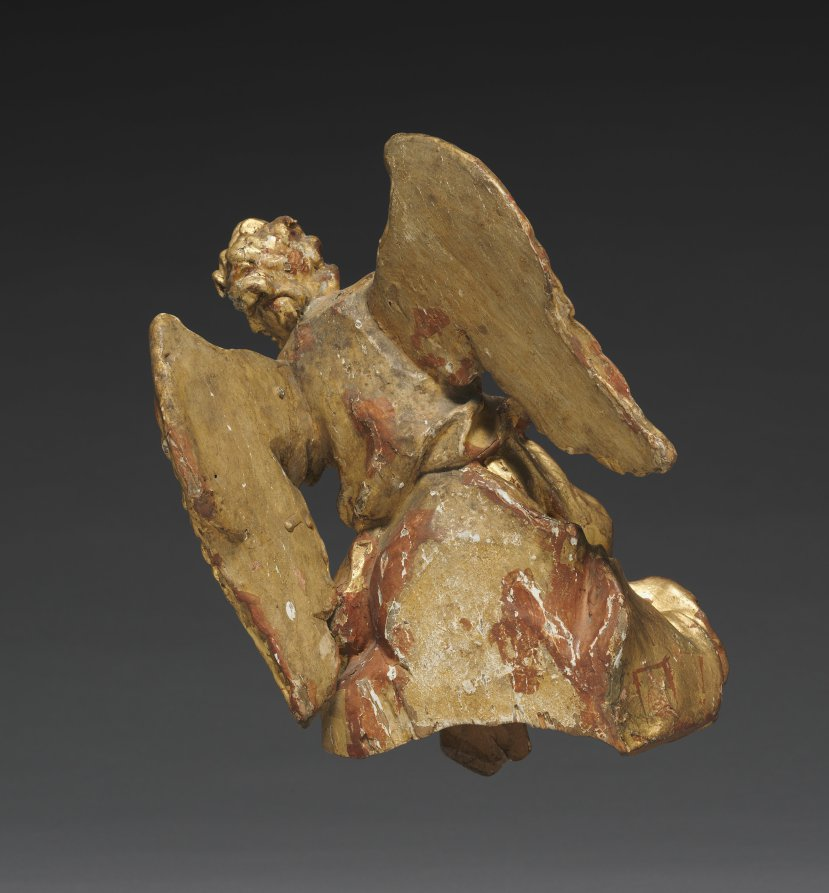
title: Altarpiece with Relics - Angel, lower left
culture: Germany, Bavaria, 18th century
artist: Joseph Matthias Götz (German, 1696–1760)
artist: and Workshop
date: c. 1735–40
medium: gilded wood, with relics in niches: gilded wood, mother-of-pearl, ebony, red silk, gold wire, seed pearls, rock crystal, pen and ink on paper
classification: Sculpture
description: Götz covers every surface in gold leaf, giving each part of the object equal importance, rather than simply framing a central picture. In this distinctively Central European approach, figural narrative is subordinate to the overall ensemble. Götz designed this object to rest on top of an altar, probably in front of a larger painted or sculpted decorative scheme. The work contains relics seen through the small windows on the perimeter. These small remains of holy figures demonstrate the persistence of a medieval Catholic tradition well into the 1700s.